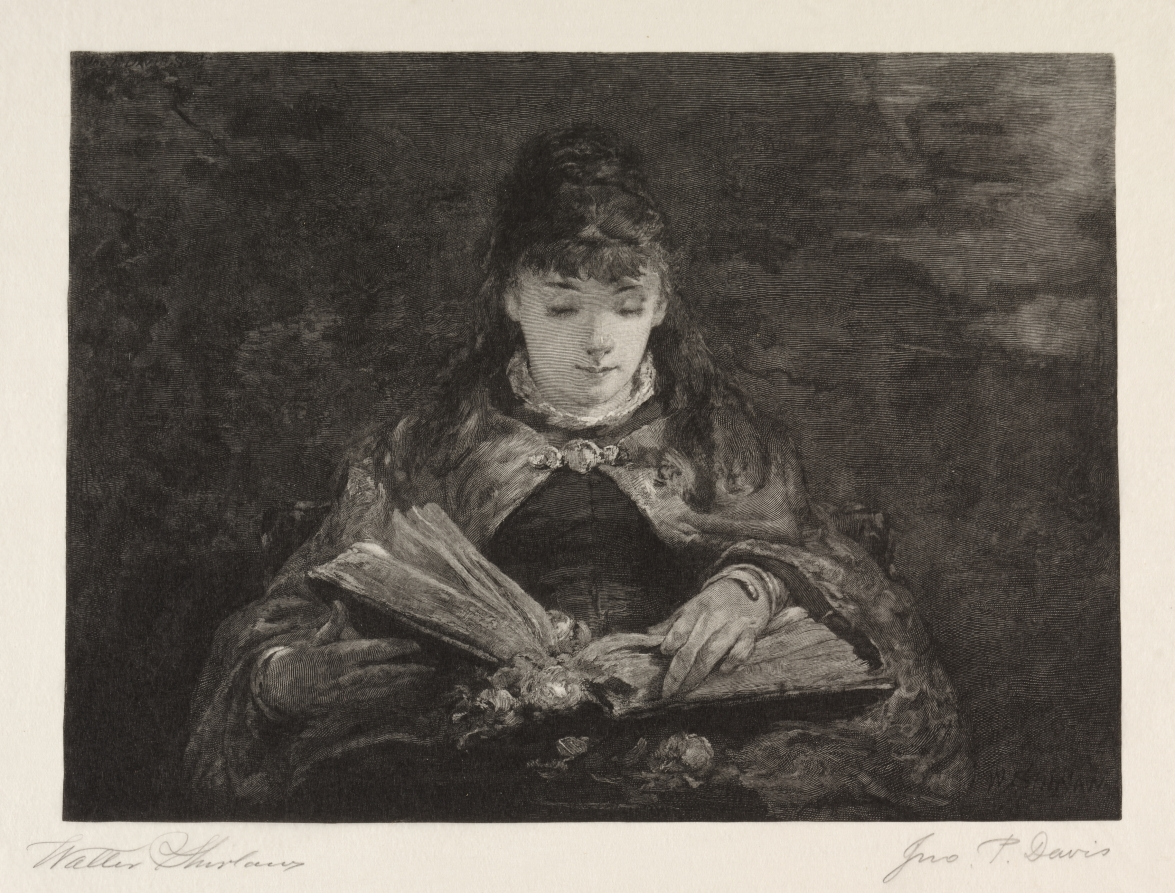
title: Among the Old Poets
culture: America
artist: John Parker Davis (American, 1832–1910)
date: 1887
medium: wood engraving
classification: Print